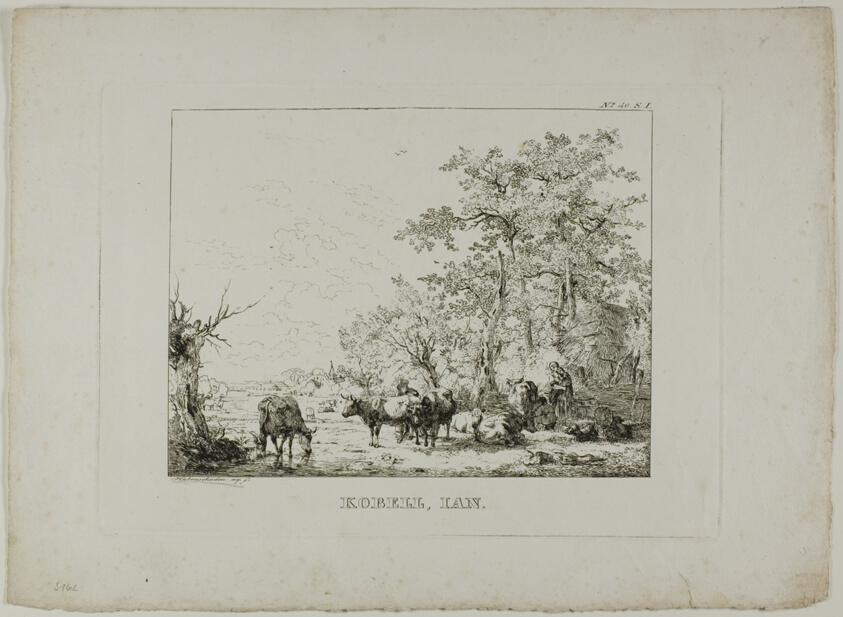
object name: Print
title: The Milkmaid on the Path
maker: Sebastian Habenschaden (German, 1813-1868)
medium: Etching on ivory wove paper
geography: Germany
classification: etching; print; prints and drawing